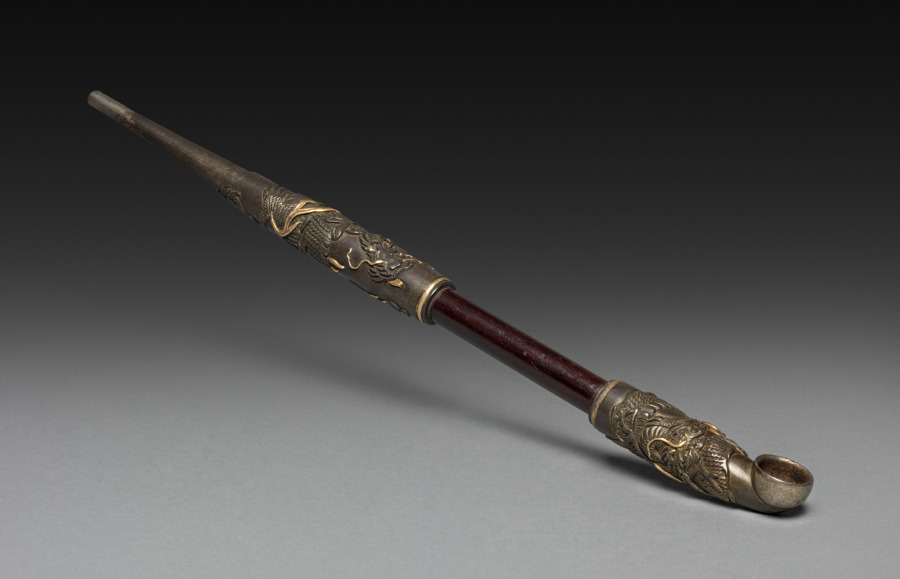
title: Tobacco Pipe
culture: Japan, Edo period (1615–1868)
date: early to mid-1800s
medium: wood, iron, and silver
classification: Miscellaneous